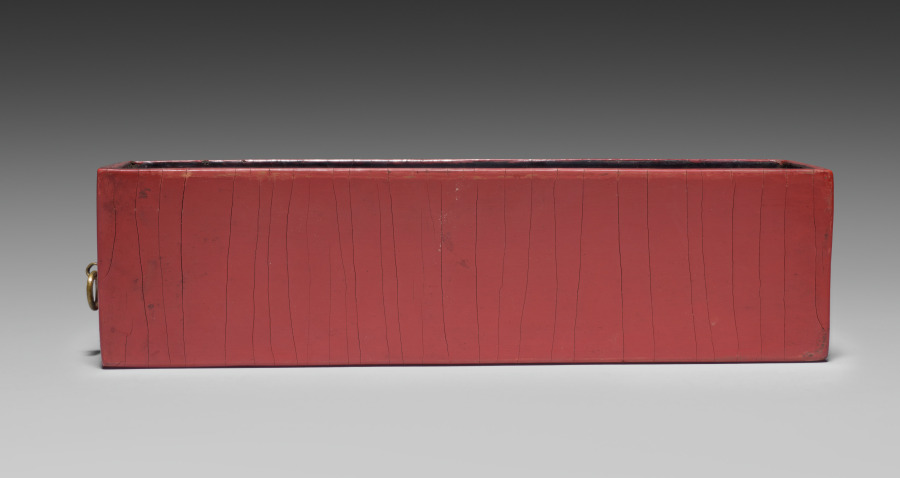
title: Drawer for a Tihong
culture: China, Ming dynasty (1368-1644), Wanli reign (1572-1620)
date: 1585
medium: carved cinnabar lacquer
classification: Lacquer